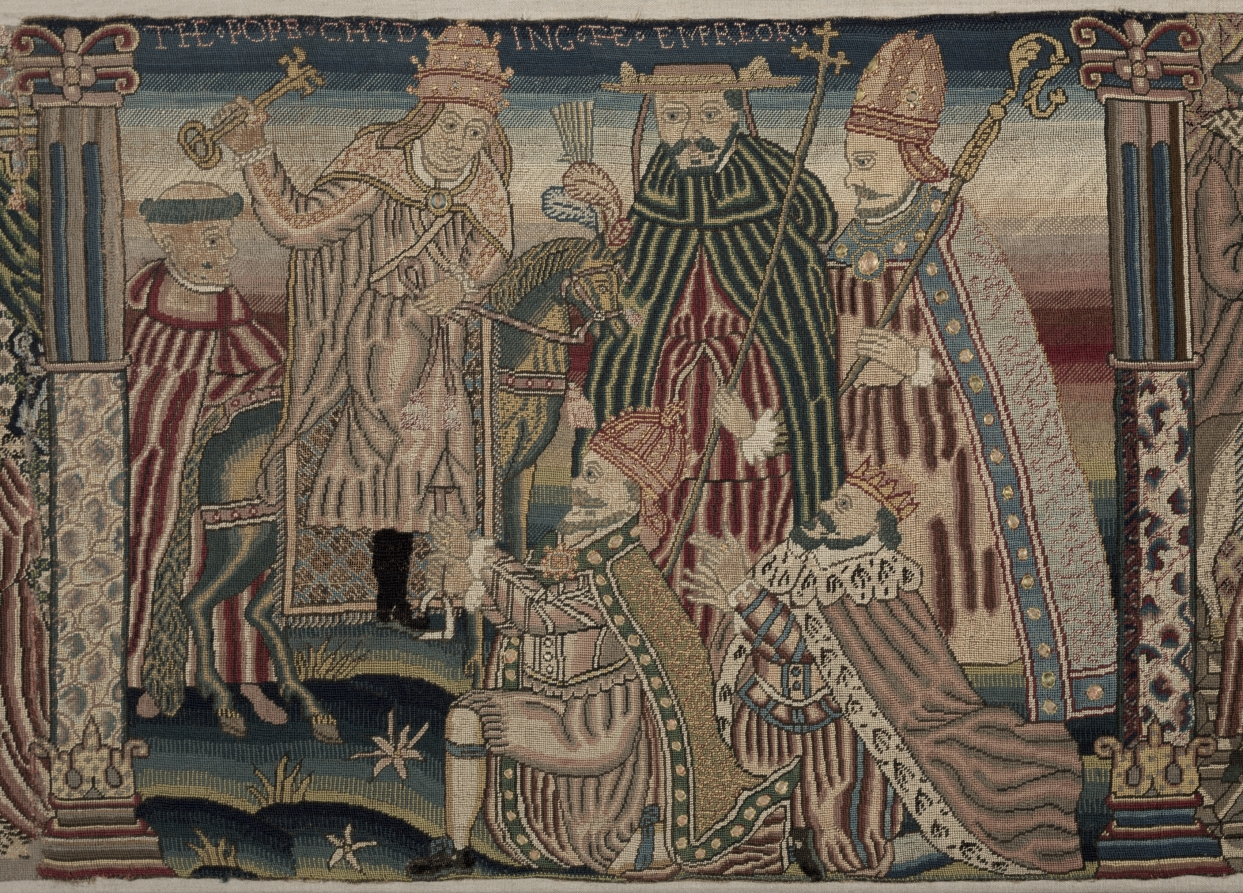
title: Section of an Embroidered Frieze: Ahasuerus and Esther, The Pope Chiding the Emperor, Henry VIII treading on the Pope's Neck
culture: England, Period of Charles I (1625-1649), 17th century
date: 1625–1649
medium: petit-point embroidery; wool and silk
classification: Embroidery